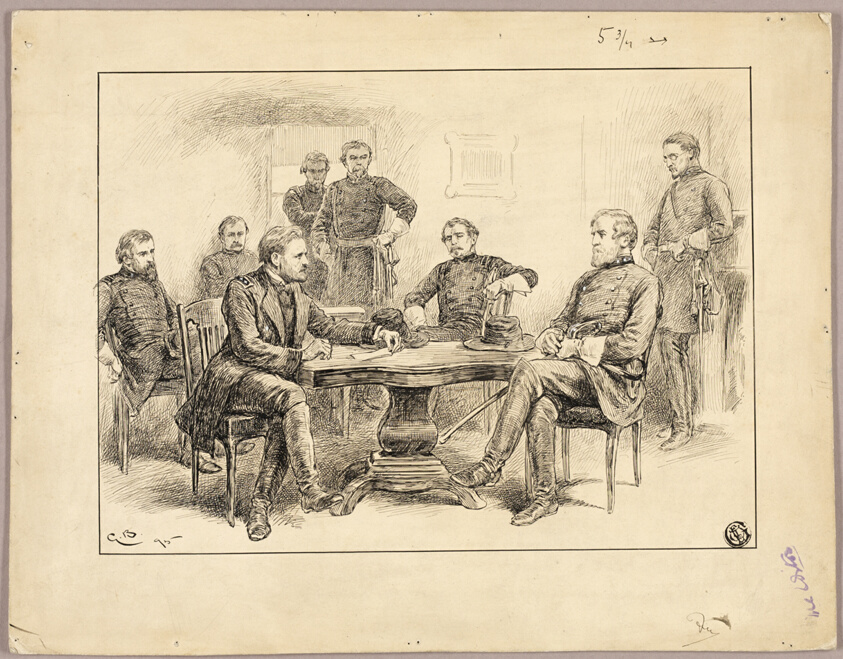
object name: Drawing and Watercolor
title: Collapse of the Confederacy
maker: Gordon Frederick Browne (English, c.1859-1932)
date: 1895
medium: Pen and black ink heightened with touches of white gouache, on cream wove board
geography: England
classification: pen and ink drawings; drawings (visual works); prints and drawing